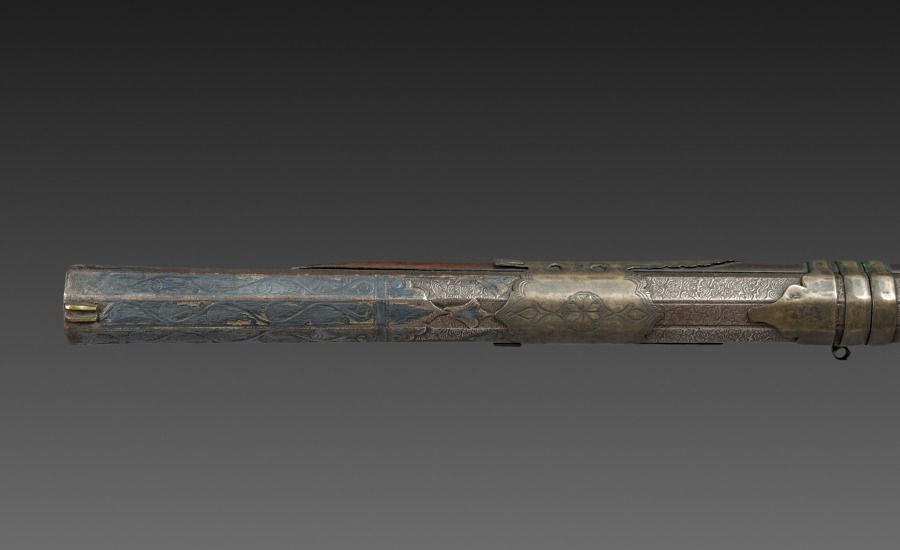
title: Matchlock Musket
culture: Turkey, Ottoman period (1299–1922)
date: c. 1750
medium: Wood, steel, brass, mother-of-pearl inlay, and leather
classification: Arms and Armor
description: Collectively, the Safavid, Mughal, and Ottoman empires are known as the Gunpowder Empires. Particularly from the 1500–1700s, they were among the strongest economic, cultural, and militaristic powers. Each trained and equipped their armies with the latest gunpowder firearms, particularly cannons and muskets. While used in battle, muskets were also used for leisure activities, particularly hunting. The decoration on this musket suggests it was a courtly item, fitted with a leather pad to protect the shooter from the force of the explosion after firing.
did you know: A matchlock musket was loaded from the muzzle end with a scouring stick kept in a sleeve on the underside of the barrel.